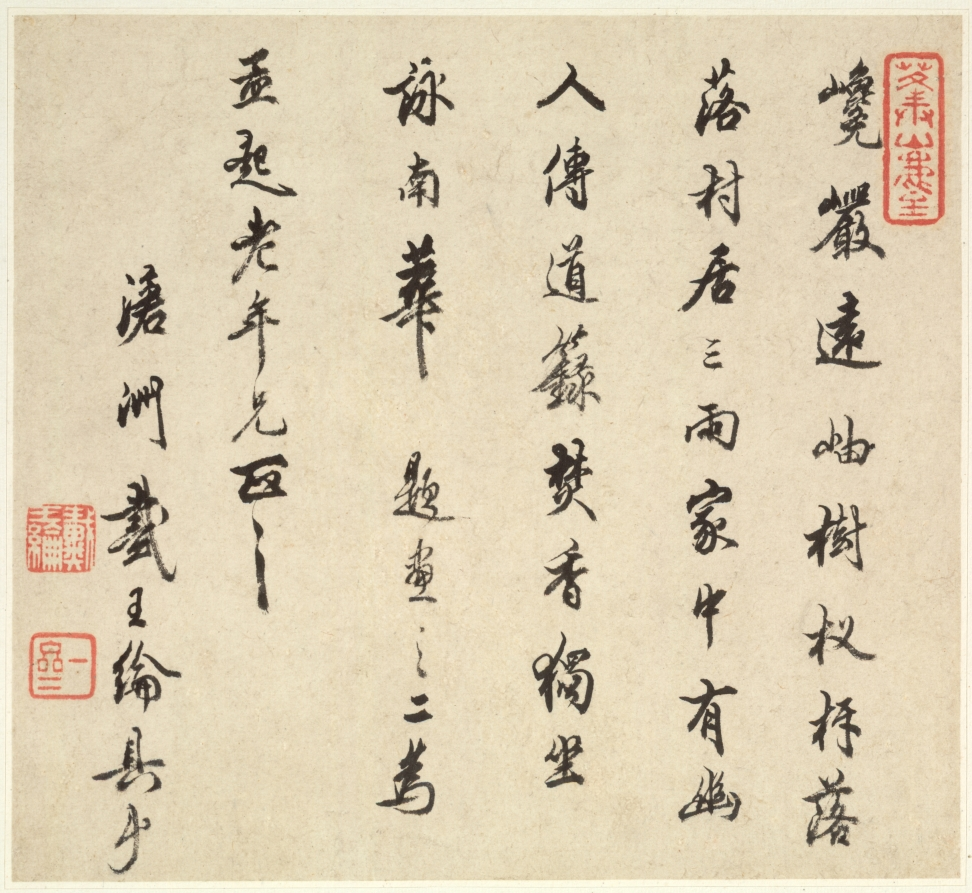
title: Album of Landscapes: Leaf 7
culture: China, Qing dynasty (1644-1911)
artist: Wang Gai (Chinese, active c. 1677–1705)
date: 1677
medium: album leaf, ink and light color on paper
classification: Painting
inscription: Artist's poem, signature and seal on leaf 7 Poem by Tai Wang-lun